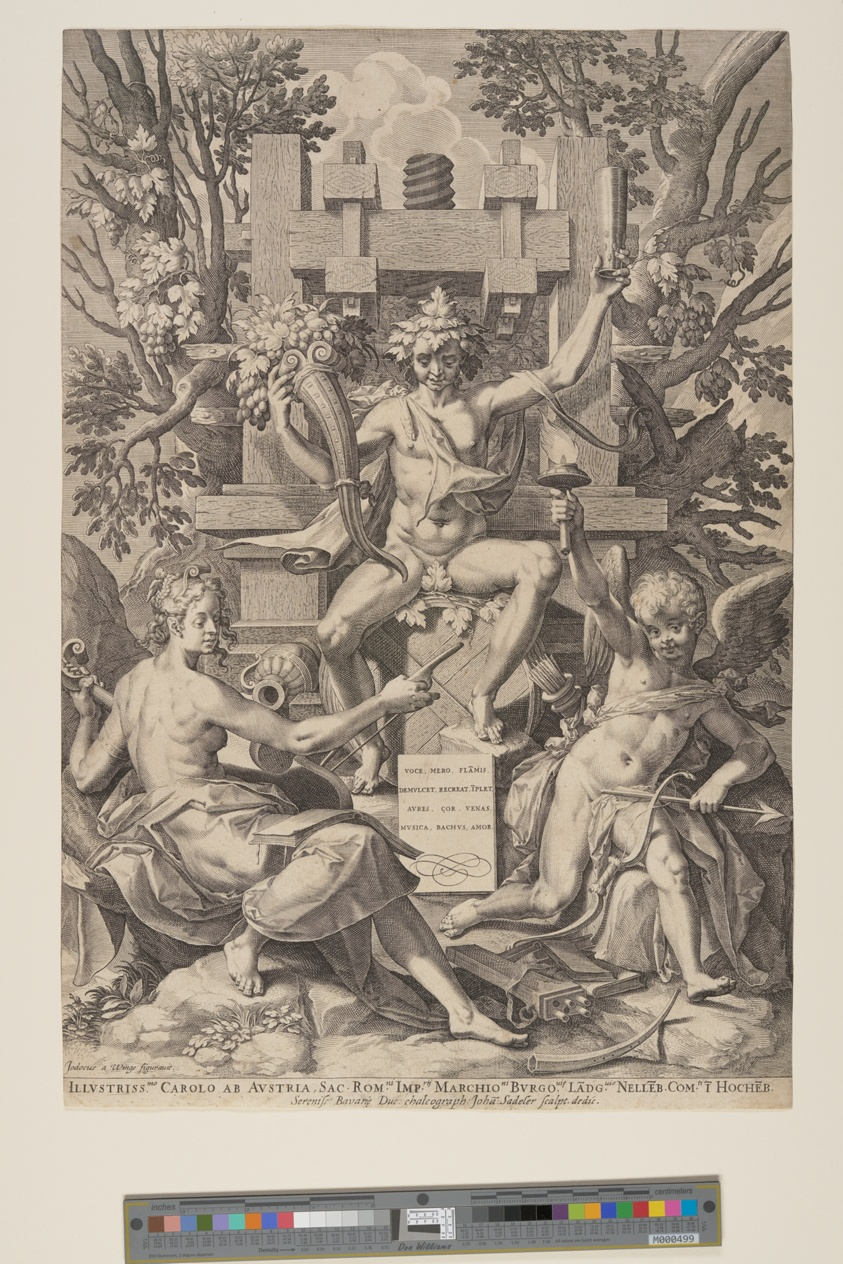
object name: Print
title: Bacchus Seated on a Barrel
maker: Jan Sadeler I (Flemish, 1550–1600); after Joos van Winghe (Flemish, 1544–1603)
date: c. 1590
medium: Engraving on ivory laid paper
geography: Flanders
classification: engraving; paper; print; prints and drawing